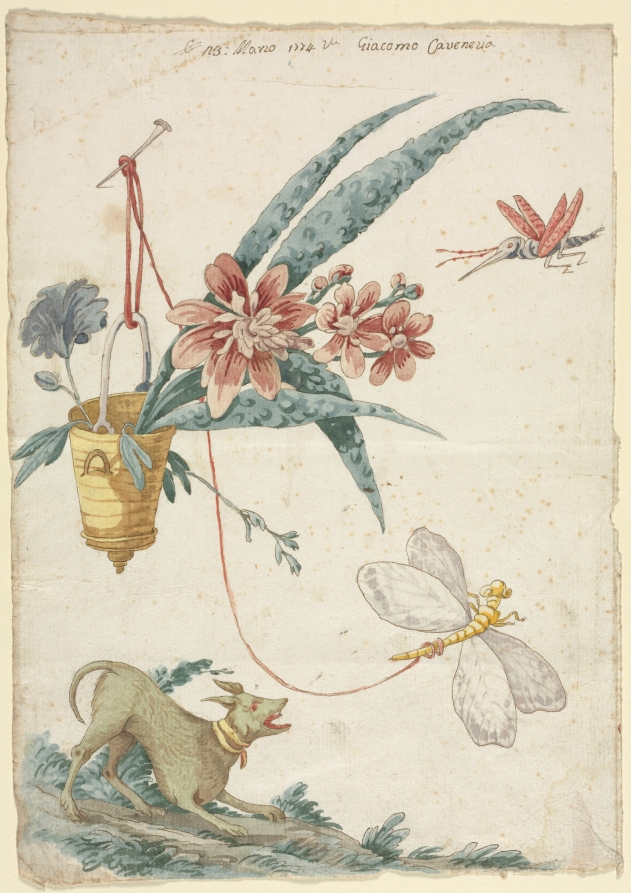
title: Floral Design with Dog and Insects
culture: Italy, 18th century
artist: Giacomo Cavenezia (Italian)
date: 1774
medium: pen and brown ink, brush and brown and gray wash, watercolor, with gouache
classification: Drawing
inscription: signed, upper right, in brown ink: Giacomo Cavenezia ; by artist, upper center, in brown ink: [G?] [crossed out twice] ; by artist, upper center, in brown ink: [2?]3: Marzo 1774 ; by artist, upper center, in brown ink: [26?] ; VERSO, upper left, in graphite: N 5